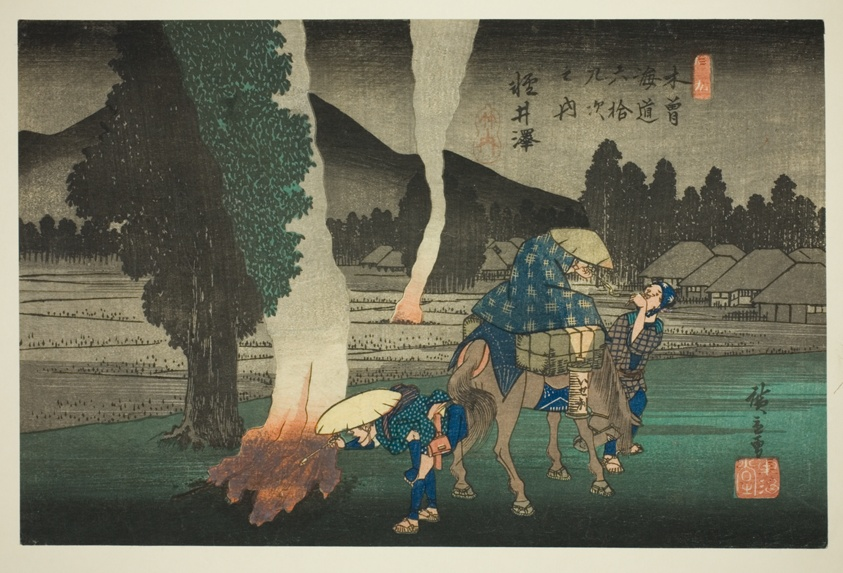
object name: Print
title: No. 19: Karuizawa, from the series "Sixty-nine Stations of the Kisokaido (Kisokaido rokujukyu tsugi no uchi)"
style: Japanese (culture or style)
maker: Utagawa Hiroshige 歌川 広重; Japanese, 1797-1858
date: c. 1835/38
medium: Color woodblock print; oban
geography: Japan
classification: woodblock print; print; asian art